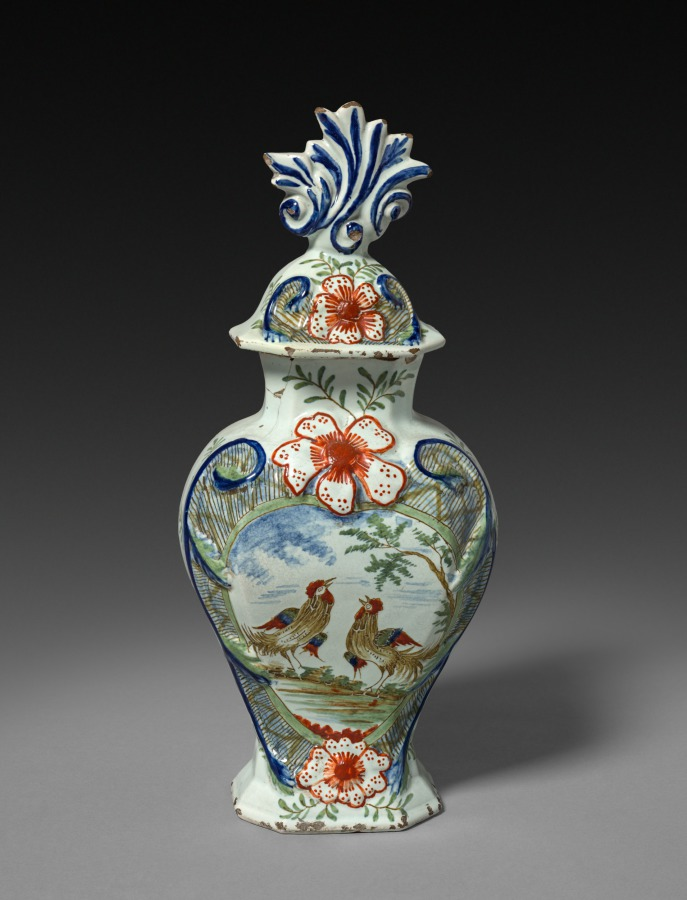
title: Covered Vase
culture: Netherlands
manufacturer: probably by Het Bijltje Factory (Dutch)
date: mid 1700s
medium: delftware (tin glazed earthenware)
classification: Ceramic